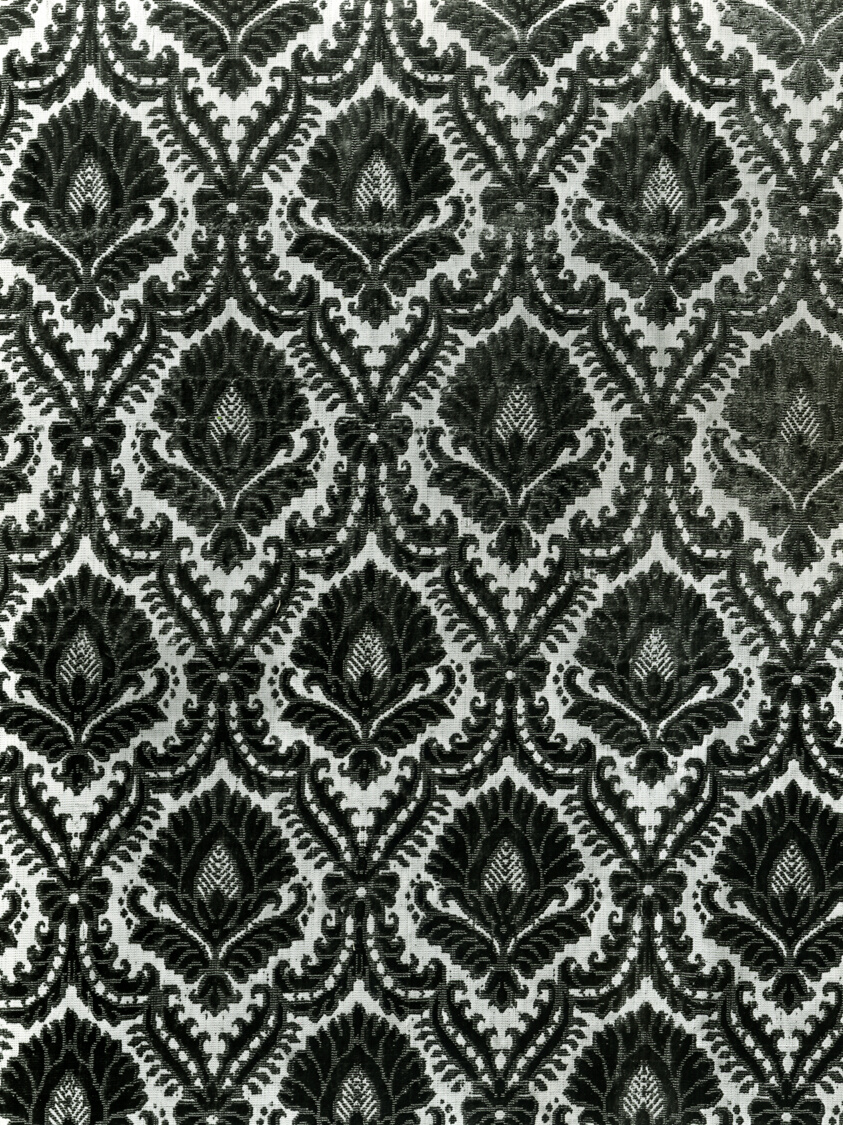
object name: Textile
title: Panel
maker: Italy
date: 1625/1650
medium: Silk, warp-float faced chevron twill weave with supplementary pile warps forming cut and uncut voided velvet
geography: Italy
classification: textile; weaving - velvet